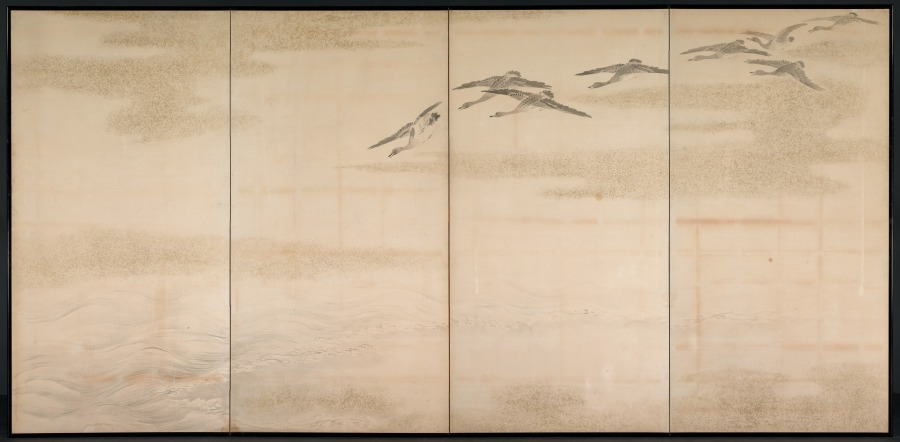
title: Geese, Reeds and Water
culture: Japan, Edo period (1615–1868)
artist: Yamamoto Baiitsu (Japanese, 1783–1856)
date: 1800s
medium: One of a pair of four-panel folding screens; ink, color, and cut gold foil on paper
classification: Painting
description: This byōbu composition differs from most in that it comprises two four-panel screens, rather than two six-panel units. Since the current mounting is modern, it is impossible to determine whether its present configuration represents its original design. Some panels may have been removed to help the screens better fit into a modern interior space. Baiitsu worked almost exclusively in monochromatic ink tones and favored classical Chinese painting themes.